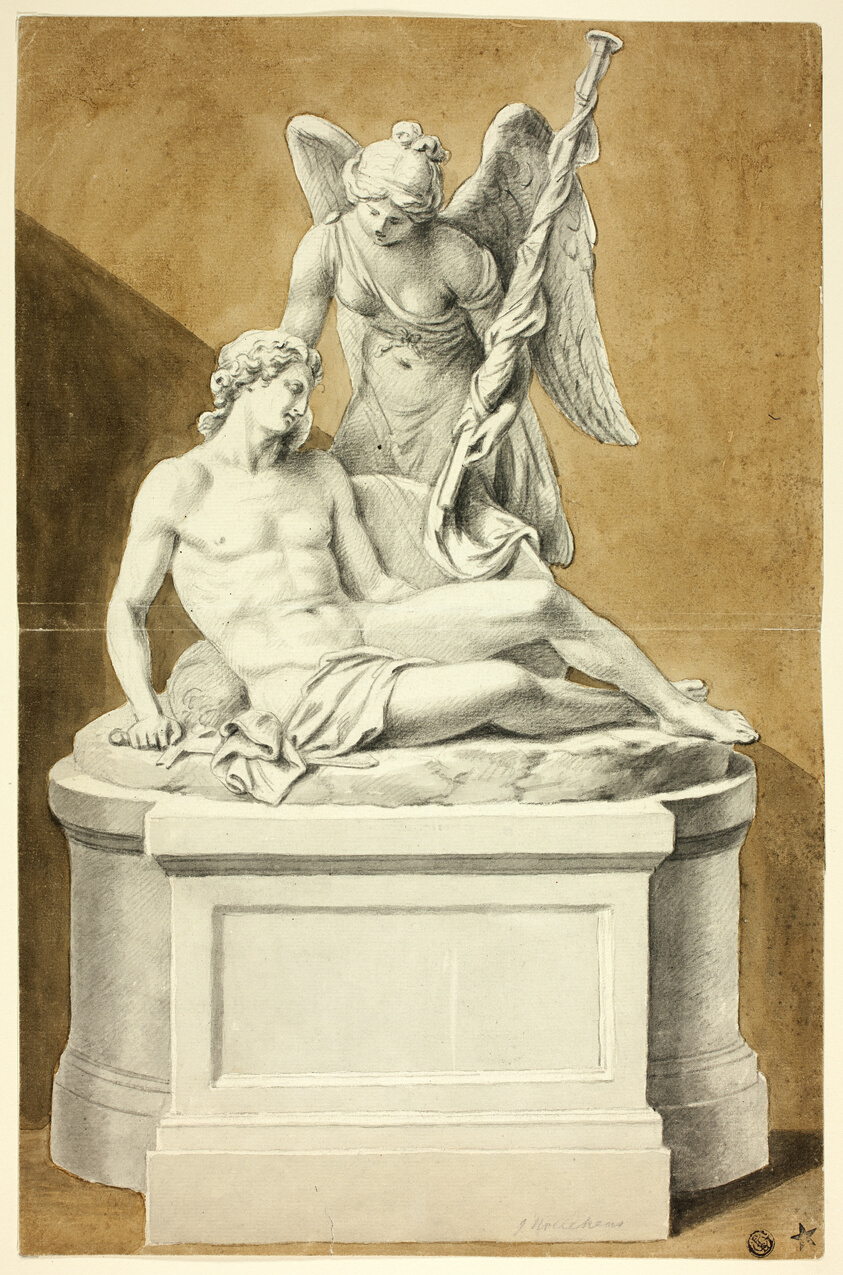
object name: Drawing and Watercolor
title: Monument with Dead Warrior and Angel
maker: Joseph Nollekens (English, 1737-1823)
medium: Black chalk, with brush and gray wash and brown wash, on ivory laid paper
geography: England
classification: ink or chalk wash; drawings (visual works); prints and drawing